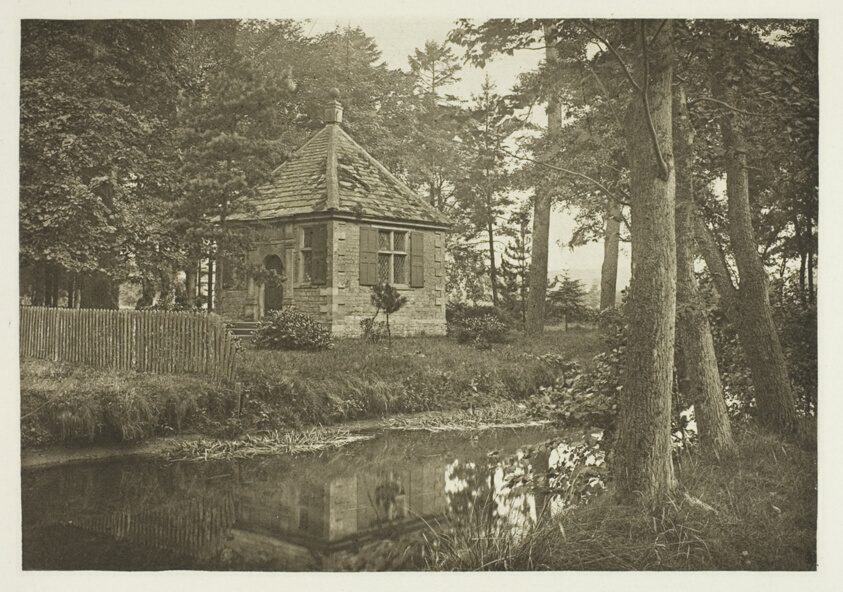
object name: Photograph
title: Walton and Cotton's Fishing House, Beresford Dale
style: 19th century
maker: Peter Henry Emerson (English, born Cuba, 1856–1936)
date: 1880s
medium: Photogravure, plate XLVIII from the album "The Compleat Angler or the Contemplative Man's Recreation, Volume II" (1888)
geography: England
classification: photogravure; photomechanical process; photography; photograph